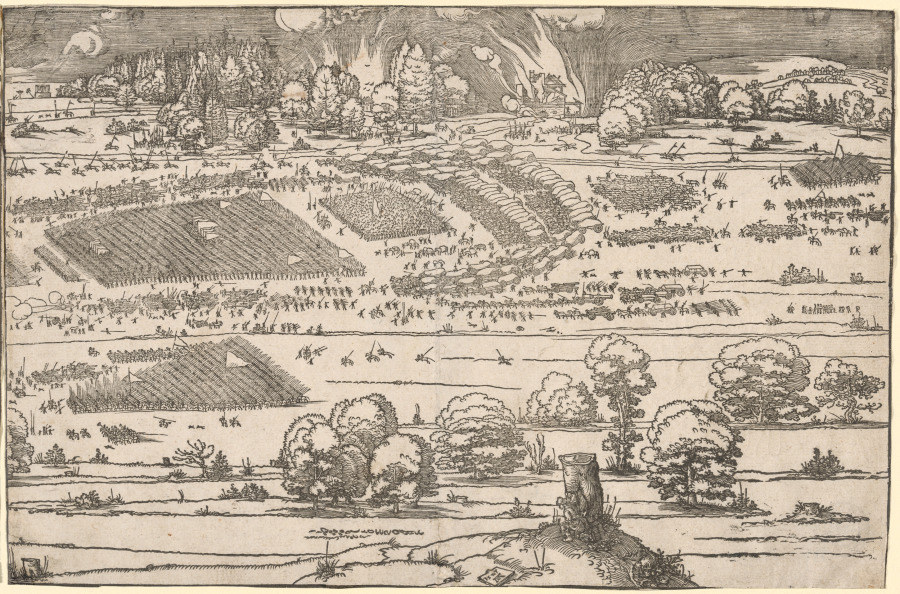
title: Siege of a Fortress: Left Portion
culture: Germany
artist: Albrecht Dürer (German, 1471–1528)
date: 1527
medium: woodcut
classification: Print